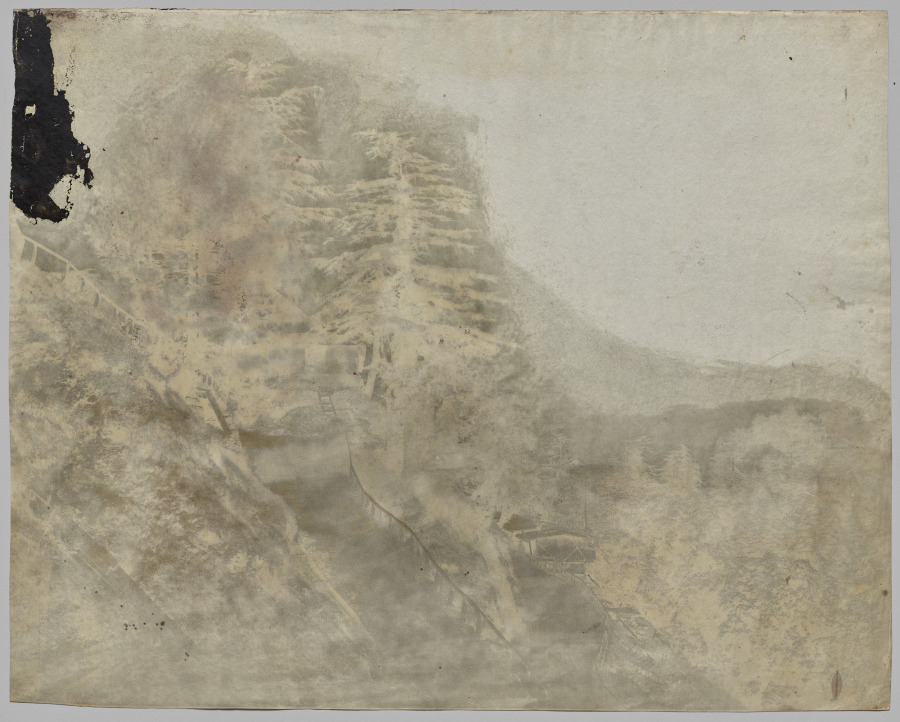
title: Shimla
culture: England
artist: Dr. John Murray (Scottish, 1809–1898)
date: 1865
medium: waxed paper negative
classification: Photograph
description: Before digital photography, most cameras yielded a negative, an image in which the tones are the reverse of those in the original subject. Early photographers shot on sheets of paper that were waxed to make them more translucent, then coated with a light-sensitive solution and exposed in the camera. To create a positive image, light was passed through the negative onto light-sensitive paper, which was developed in a series of chemical baths to create the print.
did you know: Simla, a town in the Himalayan foothills, became the summer capital of British colonial India in 1864.